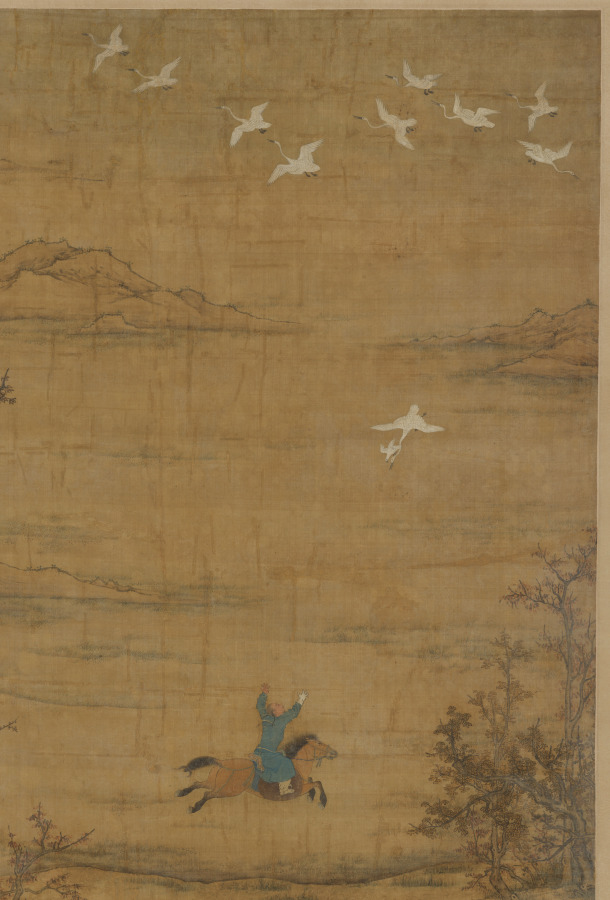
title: Hunting on Horses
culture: China, Ming dynasty (1368-1644) - Qing dynasty (1644-1911)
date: c. 1600s–1700s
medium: Hanging scroll; ink and color on silk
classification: Painting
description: This large-scale hanging scroll depicts a party hunting for waterfowl along a riverbank in the springtime. The leader is distinguished from the other five mounted hunters by his purple robe with golden dragon patterns and his white horse with a red tassel. He and his horse maintain still, dignified postures as a small white falcon captures one of the wild geese. Equestrian pursuits and hunting were particularly popular among the Khitan (also spelled “Qidan”) and Jurchen, ethnic groups who lived along China’s northeastern border. Their nomadic lifestyle intrigued the Chinese court and inspired Chinese artists to develop a painting genre showing them hunting.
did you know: This falconry scene includes one white hunting dog and four trained hunting birds.